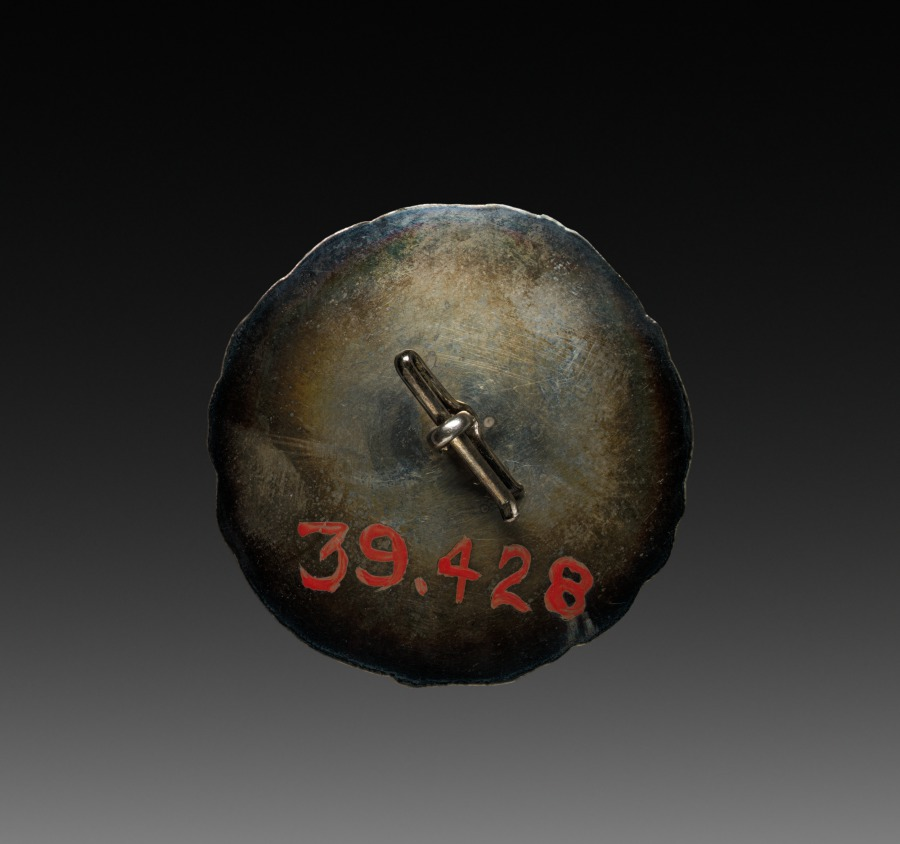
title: Button with Dragon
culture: Japan, Meiji period (1868–1912) to Taishō period (1912–26)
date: early 1900s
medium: One of a set of six buttons; cast (?) silver with relief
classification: Metalwork